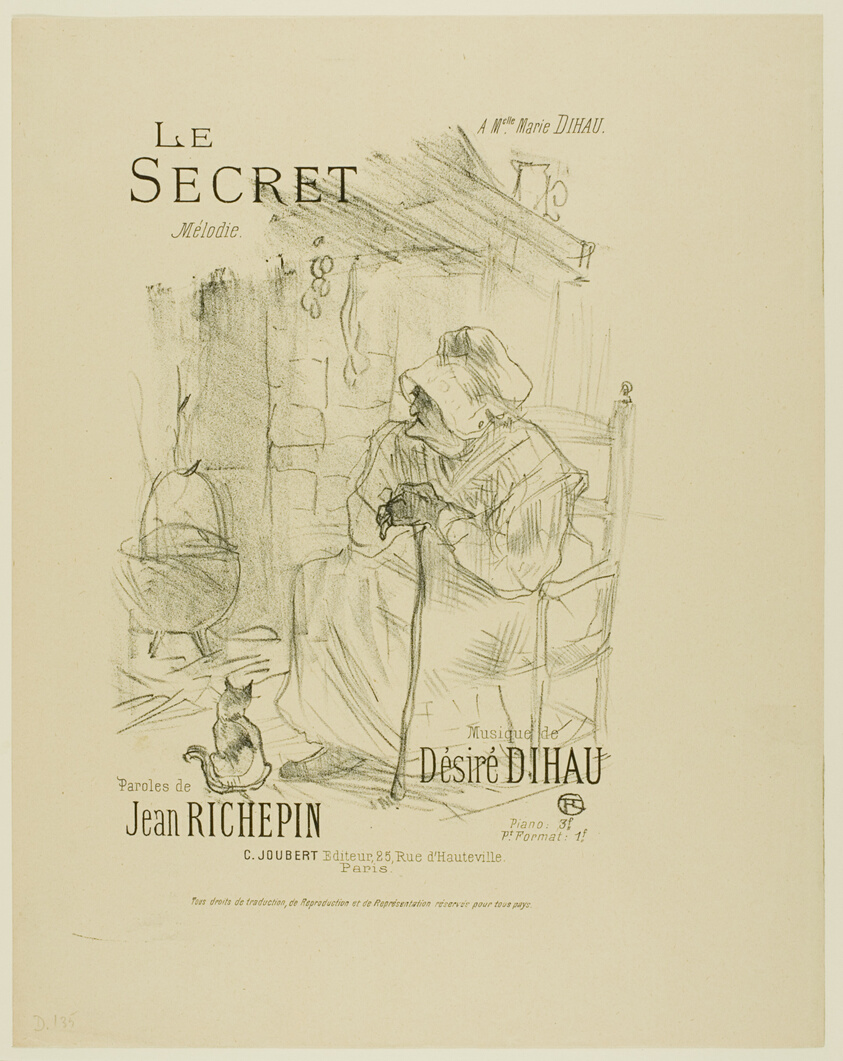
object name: Print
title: The Secret, from Mélodies de Désiré Dihau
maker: Henri de Toulouse-Lautrec (French, 1864-1901)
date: 1895, printed and published 1935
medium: Lithograph on cream wove paper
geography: France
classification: lithograph; print; prints and drawing